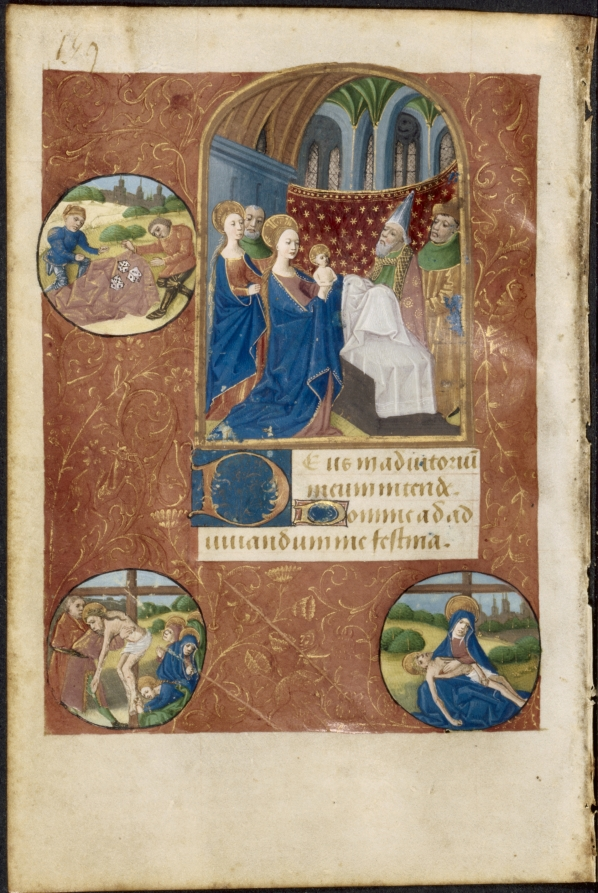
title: Leaf from a Book of Hours: Presentation in the Temple with Roundels of the Casting of Lots, the Deposition, and Pietà (None, Office of the Virgin)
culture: France, probably Poitiers, 15th century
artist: follower of Master of Adélaïde de Savoie (French, active c. 1450–70)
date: c. 1460–70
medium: ink, tempera and gold on vellum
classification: Manuscript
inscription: Deus in adiutorium meum intende. Domine, ad adiuvandum me festina.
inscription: Oratio: Omnipotens sempiterne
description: The style of this miniature, with its oval faces, abundant draperies, and use of border roundels, follows very closely the characteristics of the Master of Adélaïde de Savoie, who takes his name from a book in Chantilly (Musée Condé, MS. 1362). His activity points to Poitiers in western France as a possible place of production for this piece. The miniature features the unusual placement of roundels showing scenes taken from Christ's Passion against an episode from the life of the Virgin. The main miniature, the Presentation in the Temple, depicts the bringing of the infant Jesus to the Temple forty days after his birth to be consecrated according to Jewish law. During the ceremony, the temple's priest, Simeon, foretold that "Mary's heart would be pierced through her child." The roundels visually dovetail the central miniature.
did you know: The images and decorated initials in the book helped users navigate to sections they needed while also offering details to provoke meditation and prayer, leading to books of hours sometimes being referred to as “painted prayers.”